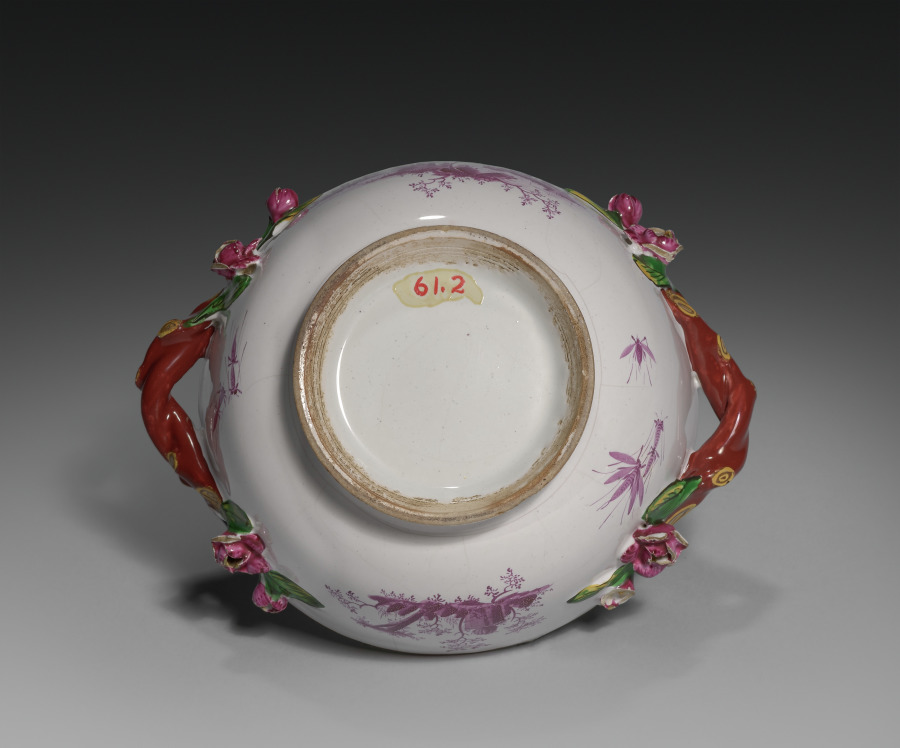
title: Bowl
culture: France, 18th century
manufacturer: Saint-Clément Factory (French)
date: c. 1775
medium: tin-glazed earthenware (faience) with enamel decoration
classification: Ceramic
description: The faience factory at Saint-Clément in eastern France closely imitated the styles and techniques employed by the Hannong's at Strasbourg. The monochrome landscapes in red on this covered bowl demonstrate the influence of German, in this case Meissen, porcelain on the faience made in this part of France.